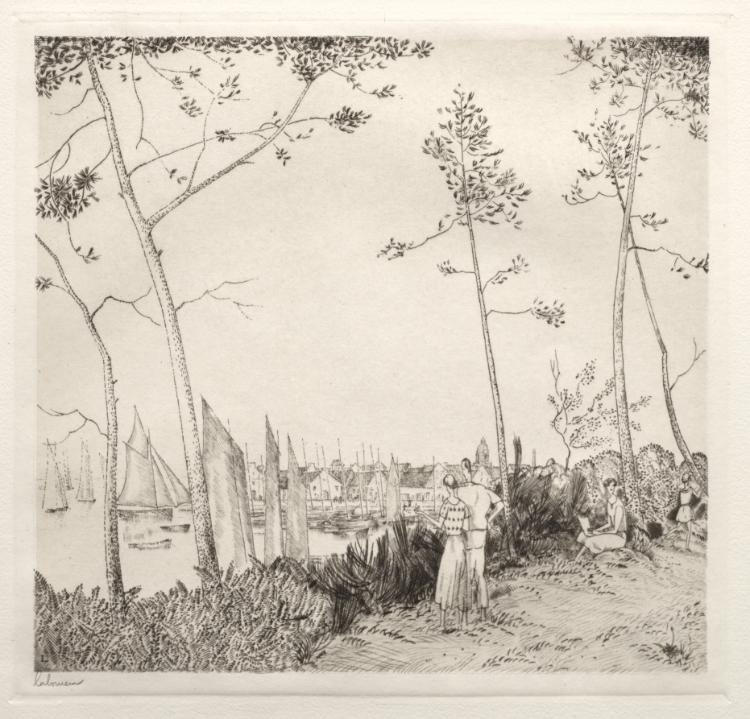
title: La Promenade sur le Port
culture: France, 20th century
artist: Jean-Émile Laboureur (French, 1877–1943)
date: 1935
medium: etching and line engraving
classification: Print